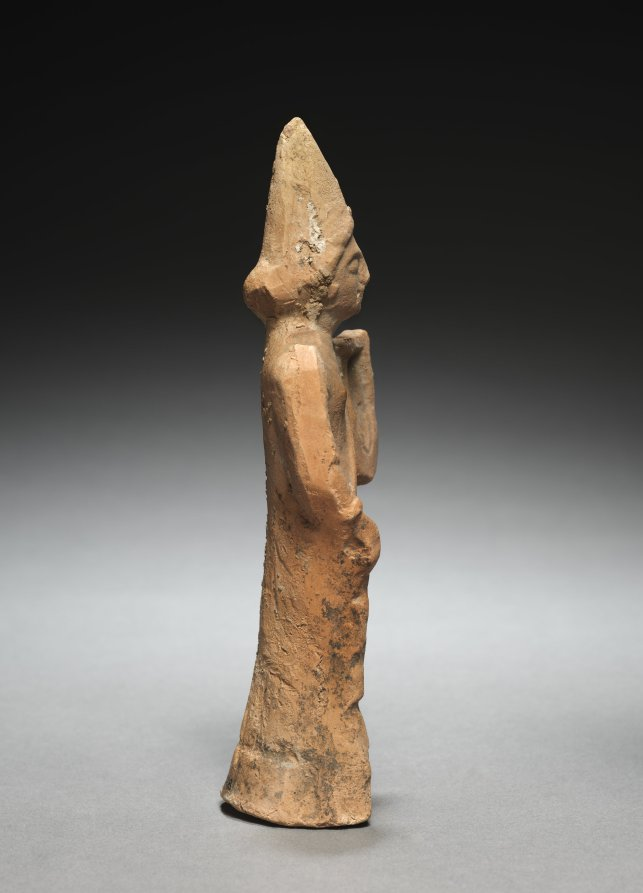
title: Draped Figure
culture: Parthian Empire (247 BCE–224 CE)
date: 1–200 CE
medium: terracotta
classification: Sculpture